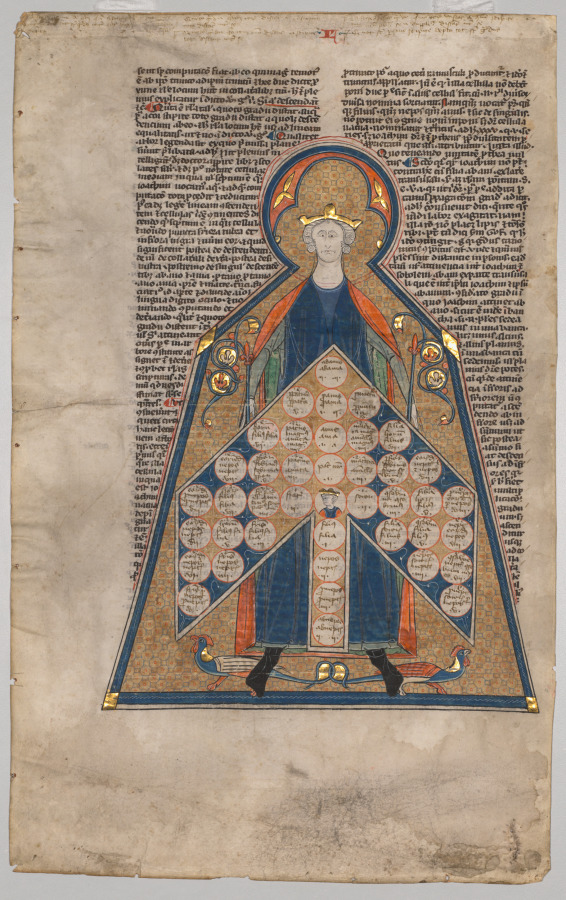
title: Leaf Excised from Henry of Segusio's "Summa Aurea": Table of Consanguinity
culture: France, Paris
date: c. 1280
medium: ink, tempera, and gold on parchment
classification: Manuscript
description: Henry of Segusio, a professor of law at the universities of Bologna and Paris, died at Lyon in 1271. His Summa Aurea (Golden Summary) was an early treatise on canon law (church law) that was so important that it was repeatedly copied after his death. This leaf comes from one such early copy.